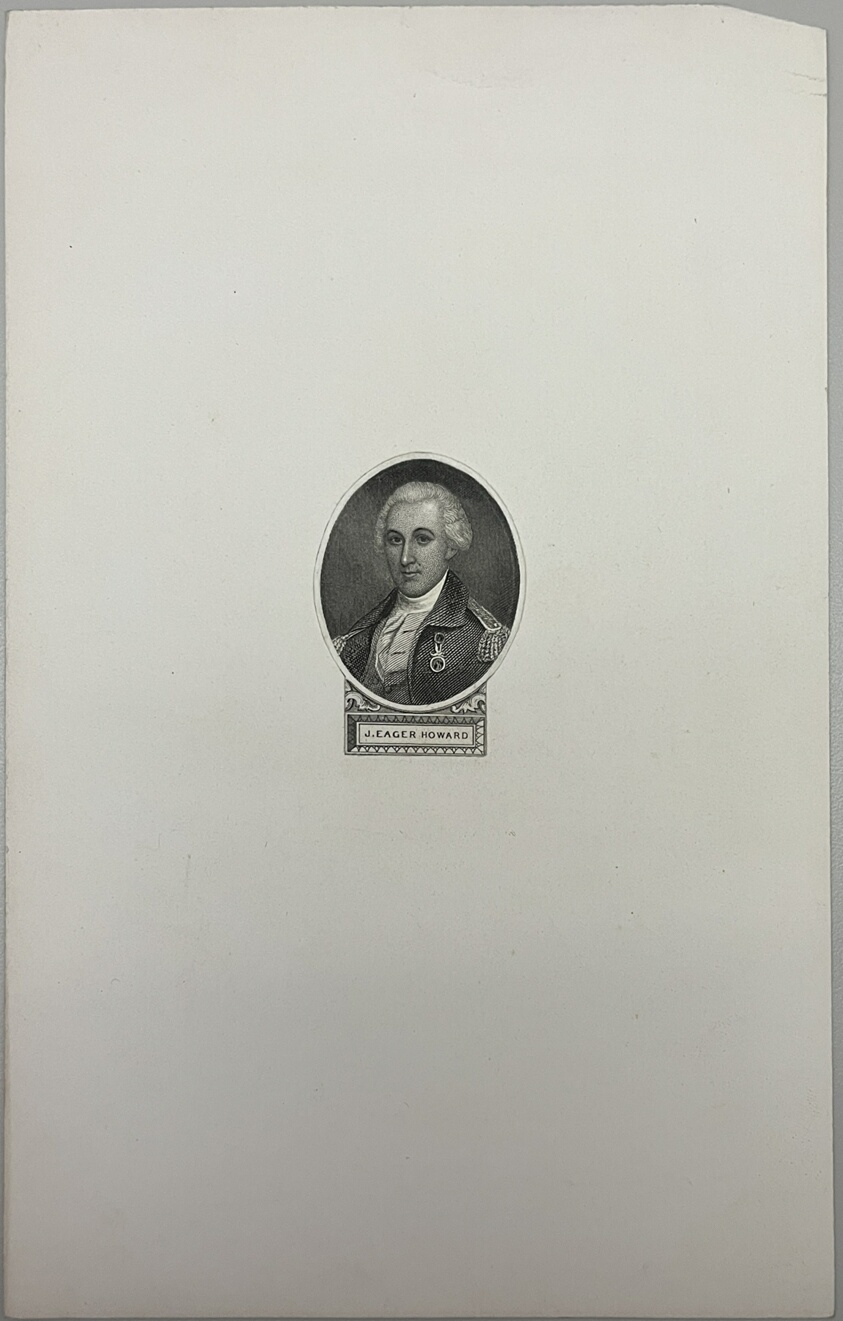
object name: Print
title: J. Eager Howard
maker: Artist Unknown (Likely American, 19th century)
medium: Etching on paper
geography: United States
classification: reproduction; print; prints and drawing